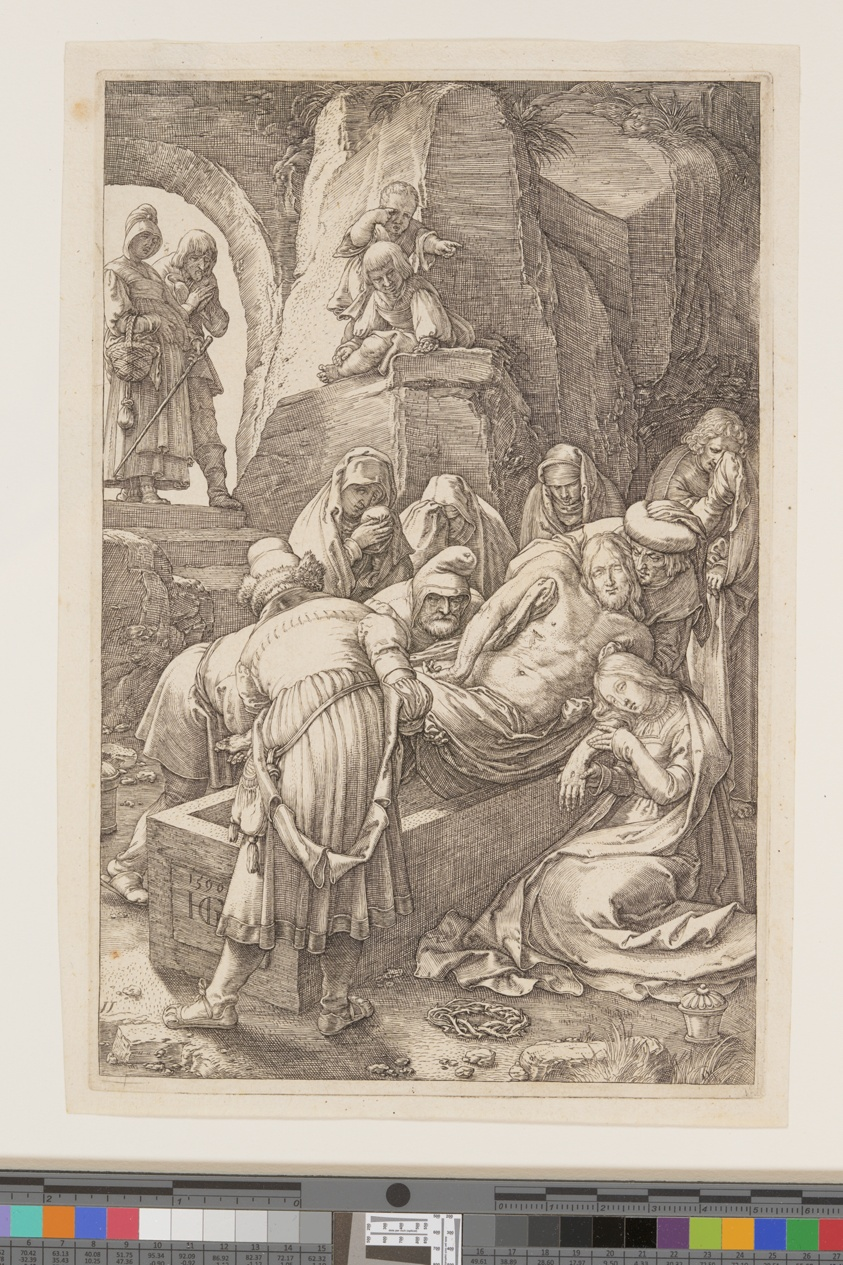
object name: Print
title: The Entombment, from The Passion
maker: Hendrick Goltzius (Dutch, 1558–1617)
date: 1596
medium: Engraving on ivory laid paper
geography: Netherlands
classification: engraving; paper; print; prints and drawing